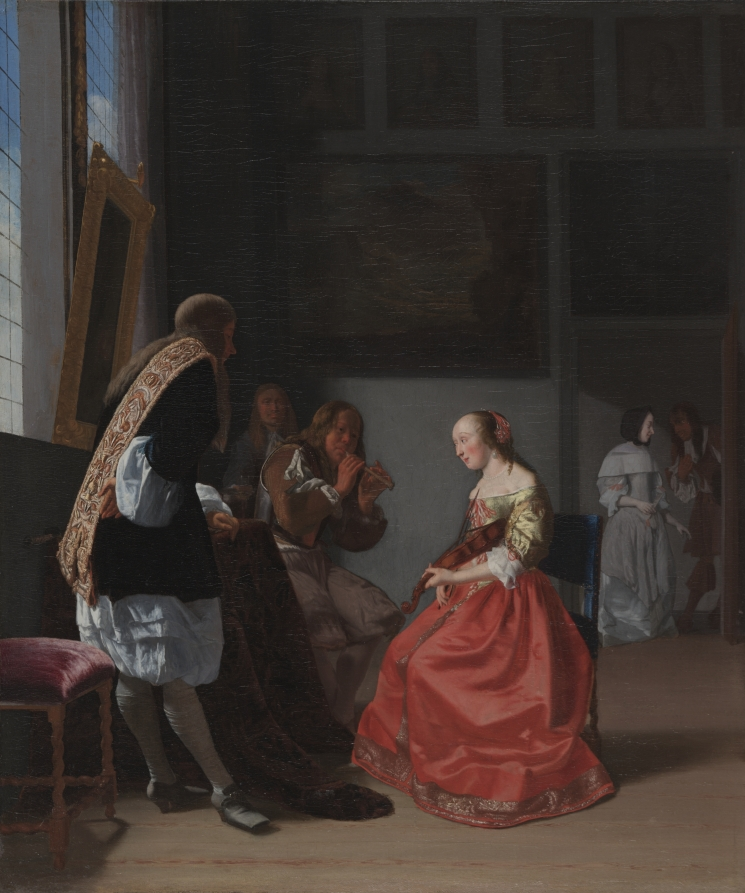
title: A Musical Company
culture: Netherlands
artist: Jacob Ochtervelt (Dutch, 1634–1682)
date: c. 1668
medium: oil on canvas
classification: Painting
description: Despite the calm demeanor and elegant disposition of the figures, this interior scene probably represents the interior of a brothel, signaled by the row of female portraits in the background, rarely found in other paintings of this period. The depiction of music provides another clue to the subject. The recorder and violin, played without scores, were perceived as cruder instrumentation and associated with prostitution, versus the elegant and complicated musicmaking seen in the work by Pieter de Hooch in the museum's collection.